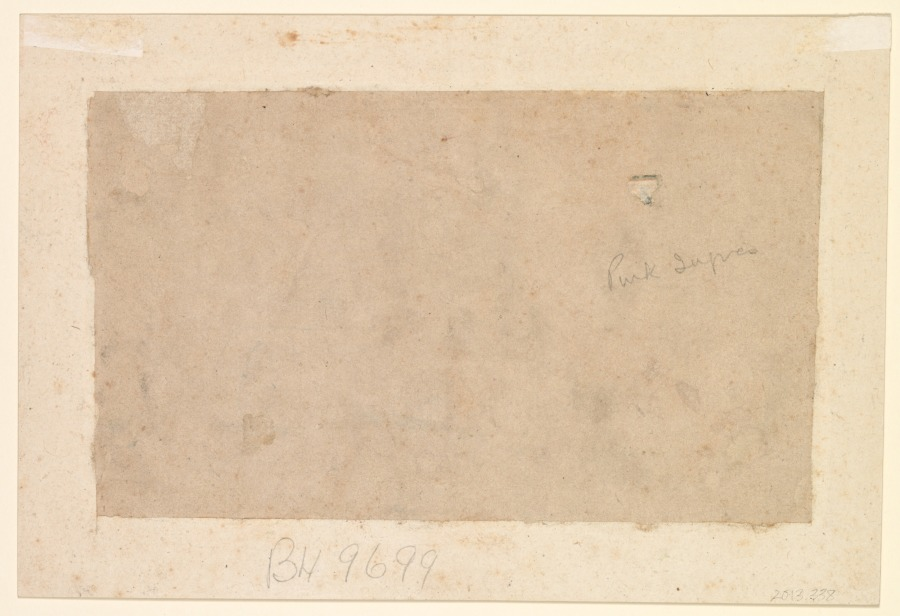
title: A princess reclining on a terrace with attendants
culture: India, Mughal, 18th century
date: c. 1730–1740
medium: Gum tempera and gold on paper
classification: Painting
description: This scene presents an idealized view of the life of a Mughal princess. Bejeweled and dressed in costly garments, she reclines on a couch set up on a white marble terrace. She watches two musicians sing and clap time, and a companion pours for her a cup of liquor. Two attendants stand behind, one waving a whisk to keep away the insects and another holding a box of paan, a betel-leaf preparation for freshening the breath. At the far right an older woman of the harem holds a fan while enjoying a hookah.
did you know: White is the color worn by widows.